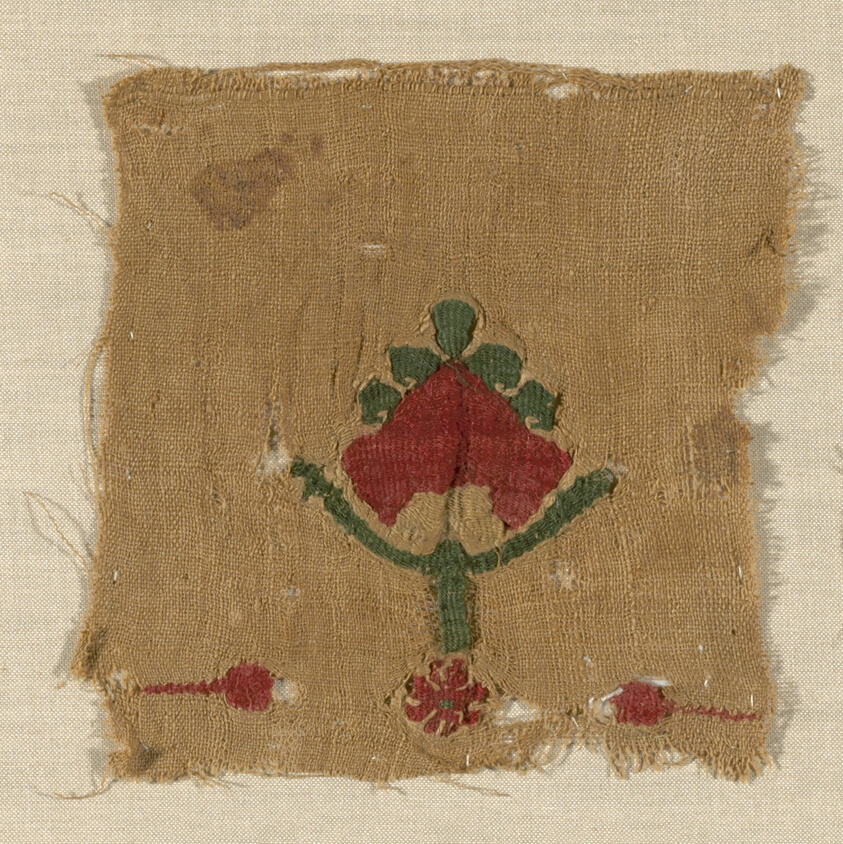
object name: Textile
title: Fragment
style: roman period (egyptian)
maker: Coptic (Egypt)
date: Roman period (30 B.C.– 641 A.D.), 5th/6th century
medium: Linen and wool, slit tapestry weave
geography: Egypt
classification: textile; weaving